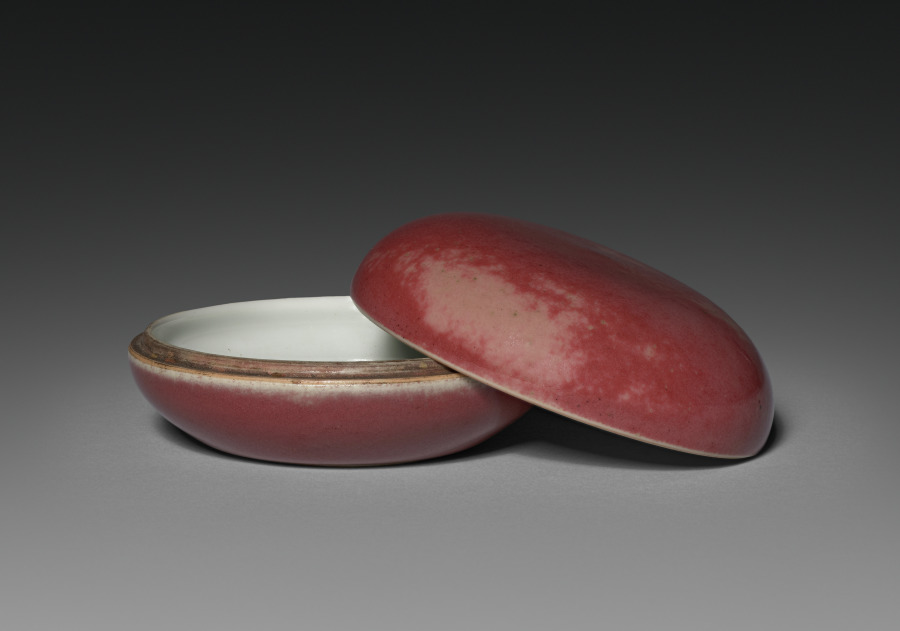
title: Seal Color Box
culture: China, Jiangxi province, Jingdezhen, Qing dynasty (1644-1911), Kangxi period (1662-1722)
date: 1662–1722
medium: porcelain with "peach bloom" glaze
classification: Ceramic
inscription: 大清康熙年制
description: The "peach-bloom" glaze developed during the Kangxi era has been described as "drunken with beauty."